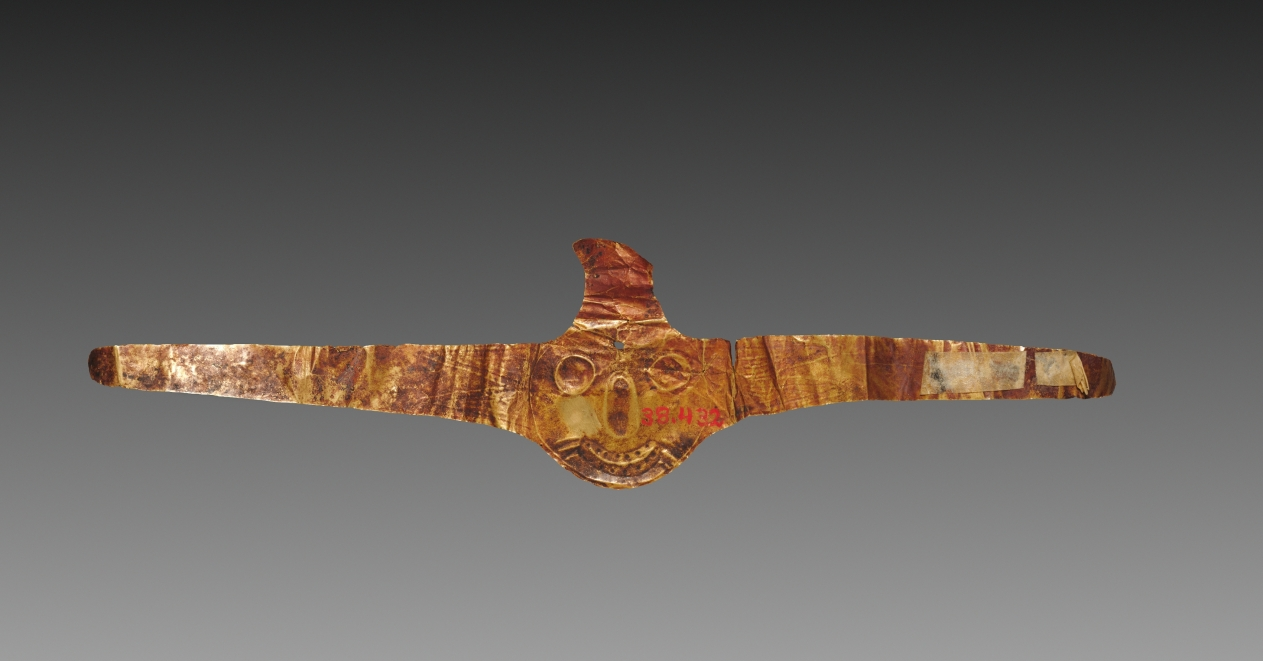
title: Headdress Ornament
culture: Peru, South Coast, Paracas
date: c. 300 BCE–200 CE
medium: hammered and embossed gold-copper alloy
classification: Jewelry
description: Gold ornaments have been discovered among the innermost wrappings of Paracas mummy-bundles, and were probably personal possessions of the deceased. The embossed image in the center of each ornament is a deity face, characterized by protruding eyes and a grinning, toothy mouth. Snakelike appendages emanate from the face. Figures embroidered on Paracas garments are frequently depicted with similarly shaped ornaments, either worn above the forehead or brandished in one hand.